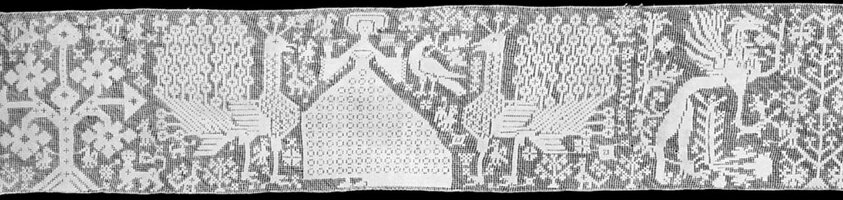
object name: Textile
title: Border (From a Bed Curtain)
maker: Italy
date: 1601/25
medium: Linen, square netting; embroidered with linen in cloth stitches (lacis)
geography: Italy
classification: textile; needlework (visual works)